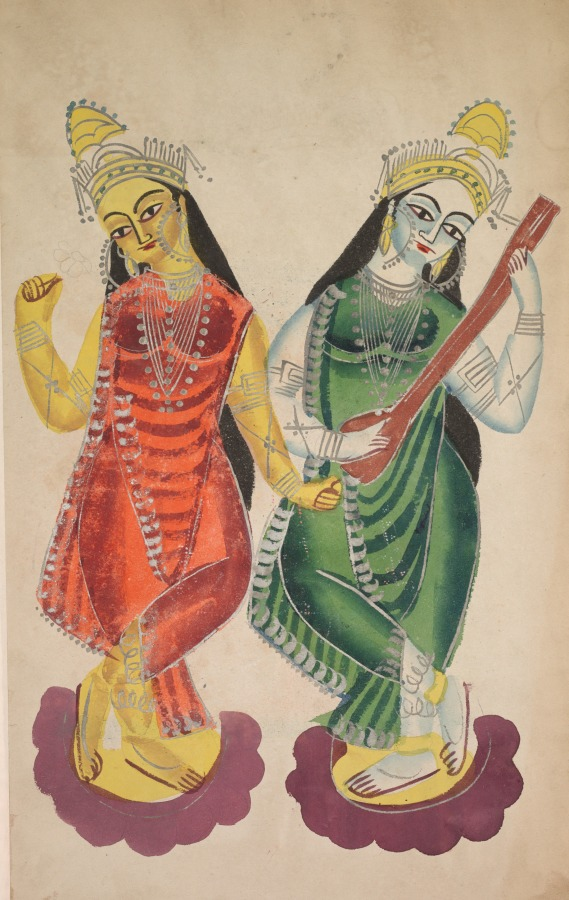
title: Goddesses Lakshmi and Sarasvati (verso), from a Kalighat album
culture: Eastern India, Bengal, Kolkata, Kalighat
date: c. 1890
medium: Gum tempera, graphite, ink, and tin on paper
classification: Painting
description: This is a symmetrical painting of two goddesses, each standing on a lotus (symbolizing beauty and purity). Both are considered in Bengali folklore to be sisters and the daughters of the goddess Durga. Lakshmi, goddess of fortune, prosperity, and beauty, and wife of Vishnu, is holding an unfinished flower. Sarasvati, goddess of knowledge, learning, and patroness of the fine arts, is holding a stringed instrument, which represents refined training and education. Sarasvati is white skinned, signifying purity.